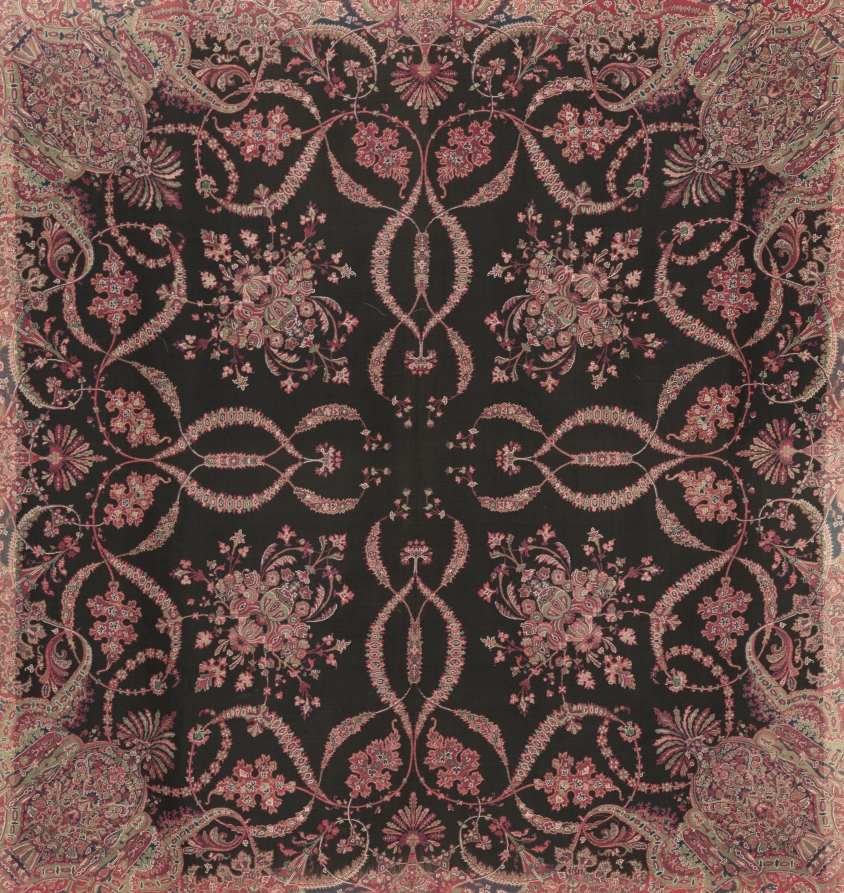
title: Square Shawl in Renaissance Style with Black Center and Quarter Shawl Layout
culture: France, Nimes; Scotland, Paisley or England, Norwich, 19th century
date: 1840s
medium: supplementary weft pattern; silk and cotton?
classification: Textile